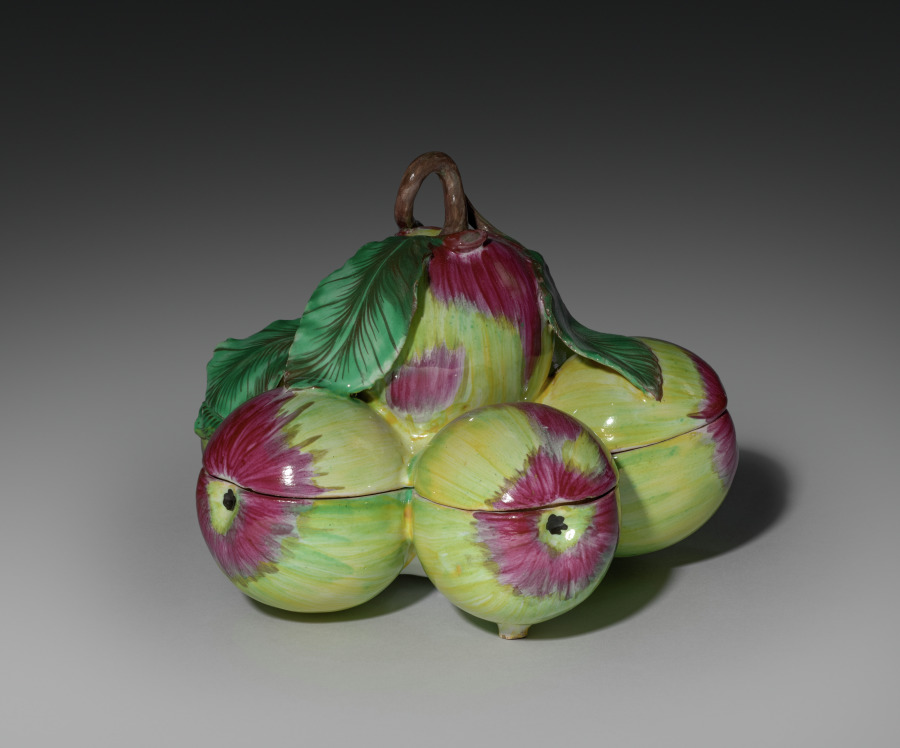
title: Covered Box in the Form of Apples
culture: France, 18th century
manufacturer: Sceaux Factory (French, active 1748–66)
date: c. 1760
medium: Tin- glazed earthenware (faience) wth enamel decoration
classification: Ceramic